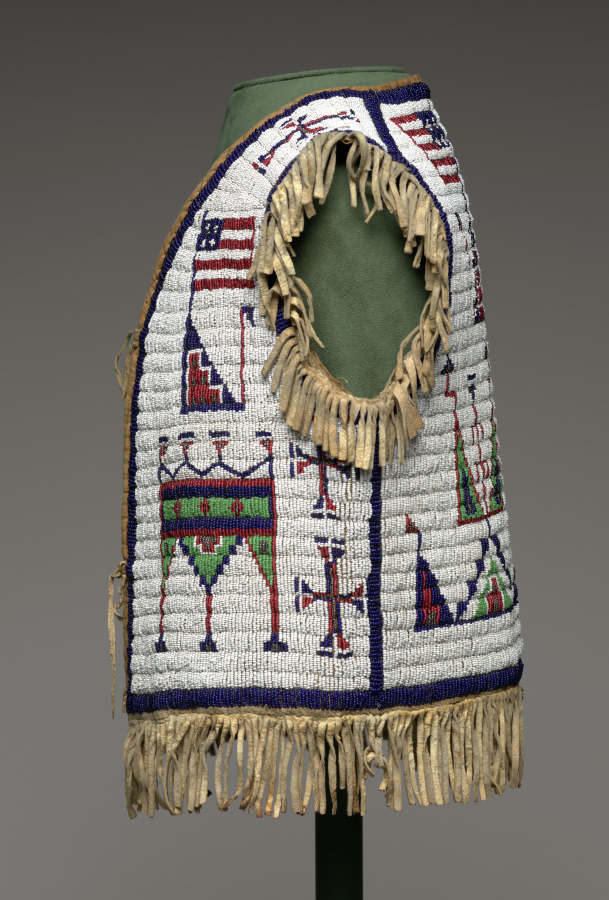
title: Boy's Vest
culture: Plains, Lakota (Sioux), 19th century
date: c. 1880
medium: beadwork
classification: Garment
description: For centuries, beautiful garments and objects have held great meaning for the native groups of the Great Plains. For instance, the Lakota (Sioux) ceremonially intone something sacred wears me. That is, humans don powerful garments but are worn, animated, and protected by the sacred forces within their materials and imagery. By 1700 European Americans began to make their presence felt in the region, and Plains people creatively adopted European materials and garment types into their wardrobes. By 1870 most Plains people had been forced onto reservations, and traditional life shattered—especially for men. The garments on display here all were made after that date.